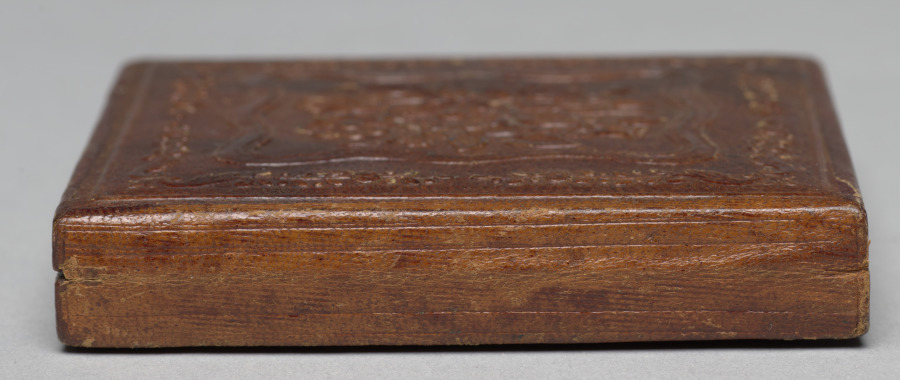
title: Crowd with sleigh in front of LL & ER Smith store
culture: America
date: c. 1858–65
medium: ambrotype, sixth plate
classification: Photograph